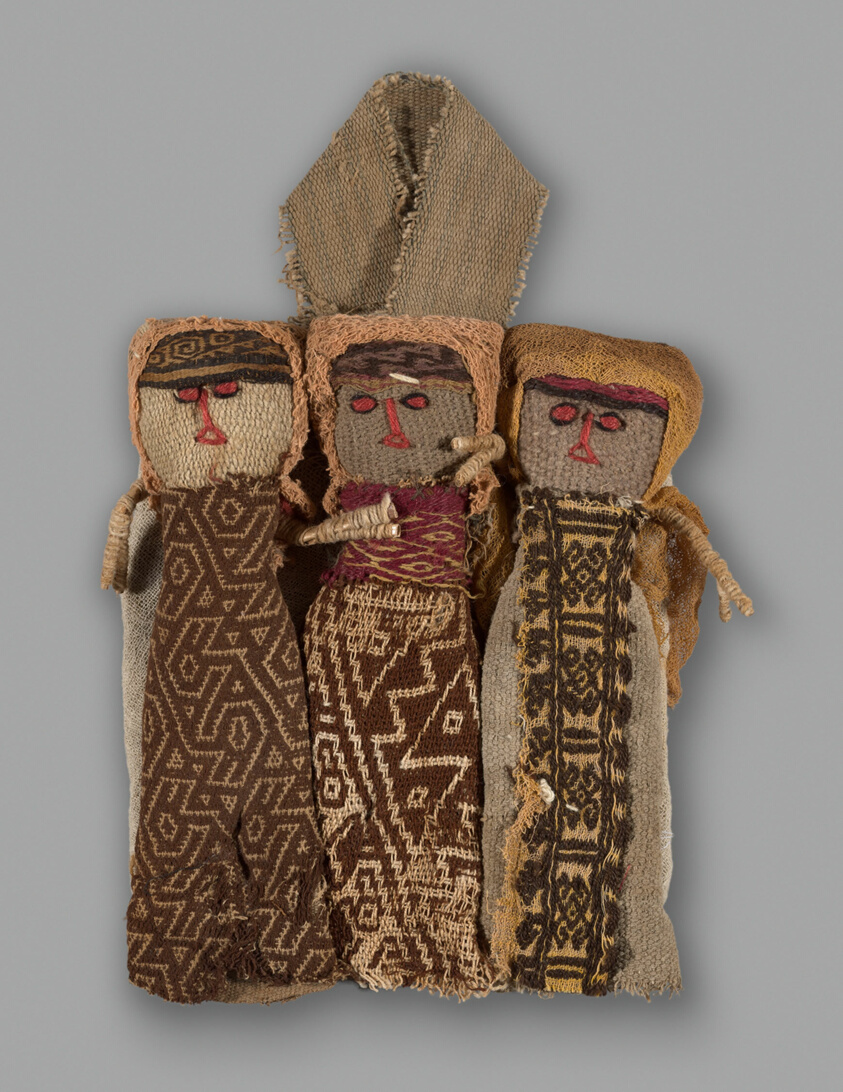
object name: Decorative Arts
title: Dolls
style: chancay, peruvian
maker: Chancay (Peru)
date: 1950/84, with textile fragments from A.D. 1000/1476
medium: Contemporary assemblage of materials from a variety of past cultures. Cotton and wool, variety of weaves; embroidered with wool in satin and back stitches; cotton wrapped twigs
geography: Peru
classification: textile; accessories (object genre); dolls (figurines); decorative arts